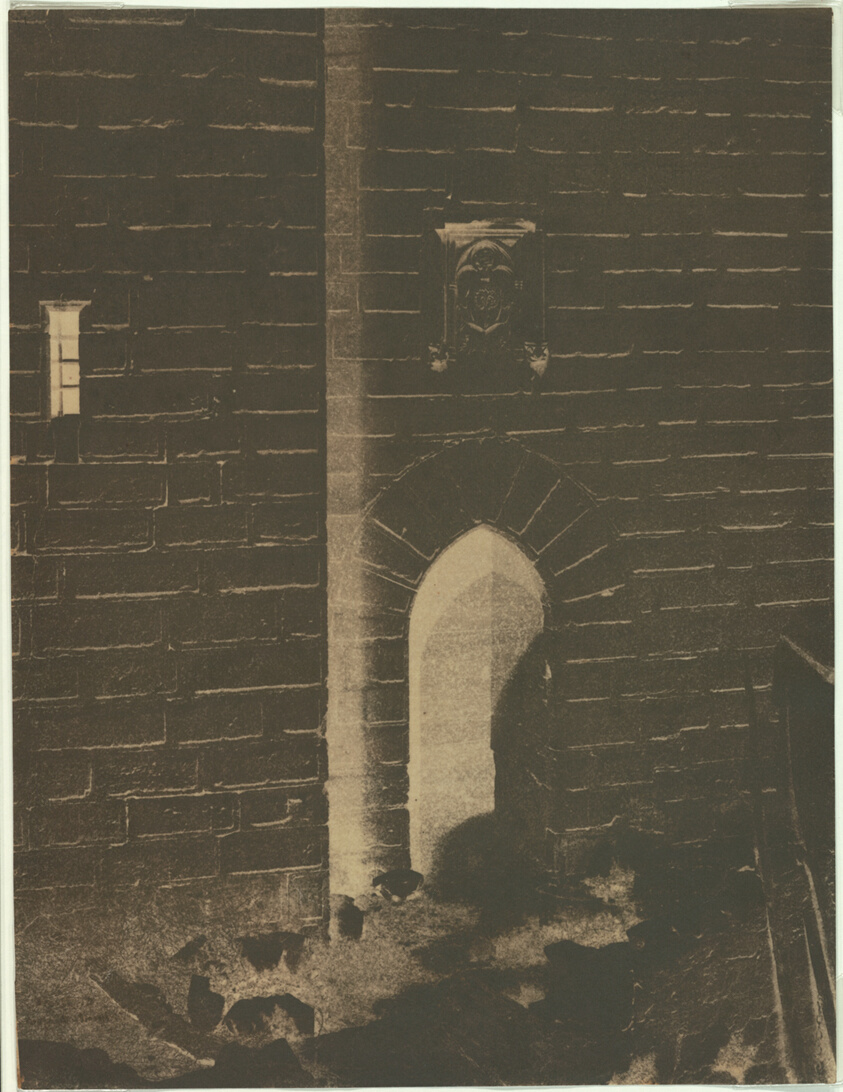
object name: Photograph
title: Mont-Majour, Poterne de la Tour de L'Abbaye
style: 19th century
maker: Charles Nègre (French, 1820–1880)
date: c. 1852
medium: Calotype negative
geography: France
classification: collotype; photograph; photography